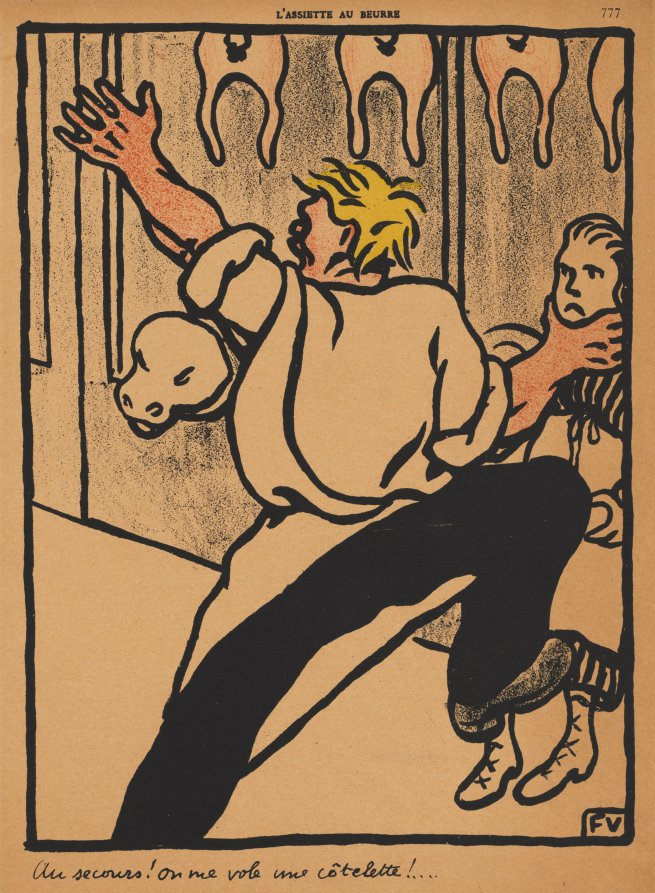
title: Help! My cutlet's being stolen!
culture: France, 19th century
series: Crimes and Punishments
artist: Félix Vallotton (Swiss French, 1865–1925)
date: 1901, published 1902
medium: color lithograph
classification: Print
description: This print was published in the magazine L’Assiette au Beurre (March 1, 1902 ) as plate 20 from the series Crimes and Punishments.